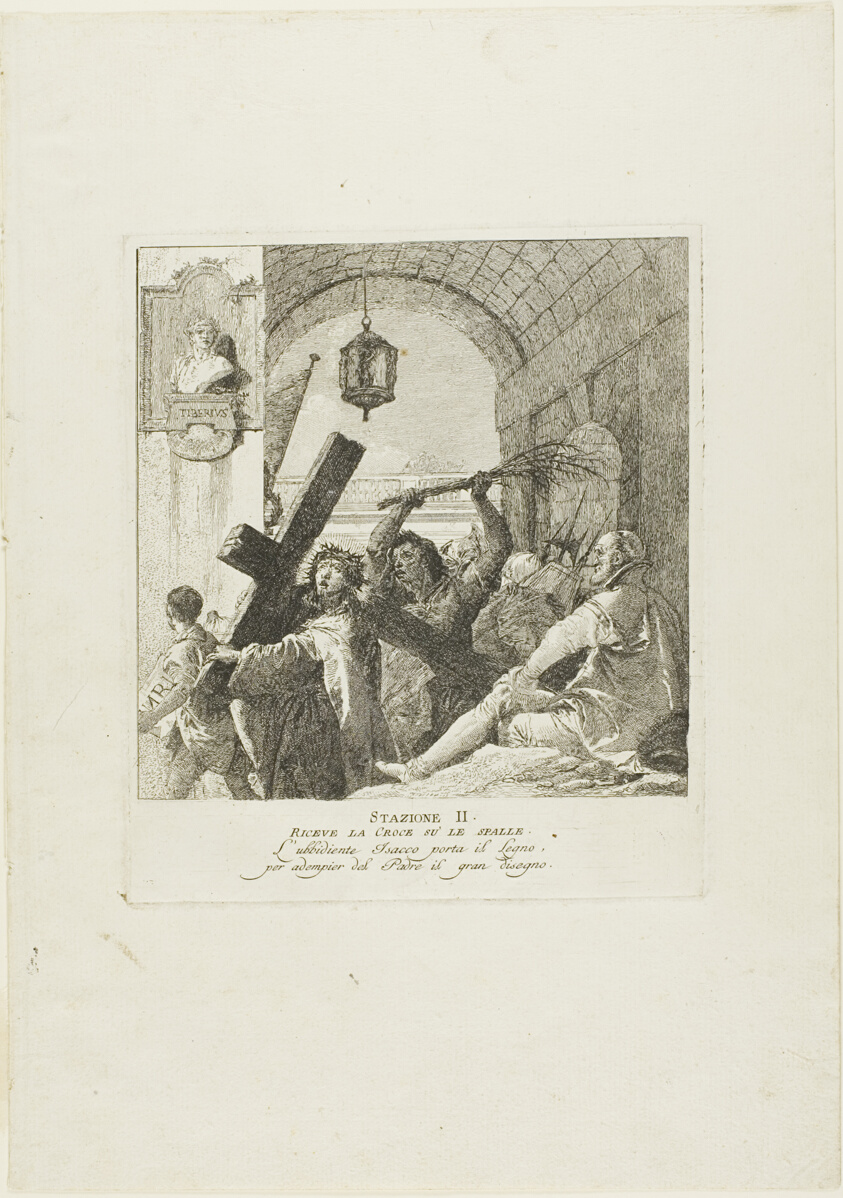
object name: Print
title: Christ Receives the Cross, plate two from Stations of the Cross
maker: Giovanni Domenico Tiepolo (Italian, 1727-1804)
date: c. 1748, published 1749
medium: Etching on paper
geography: Italy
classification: etching; print; prints and drawing